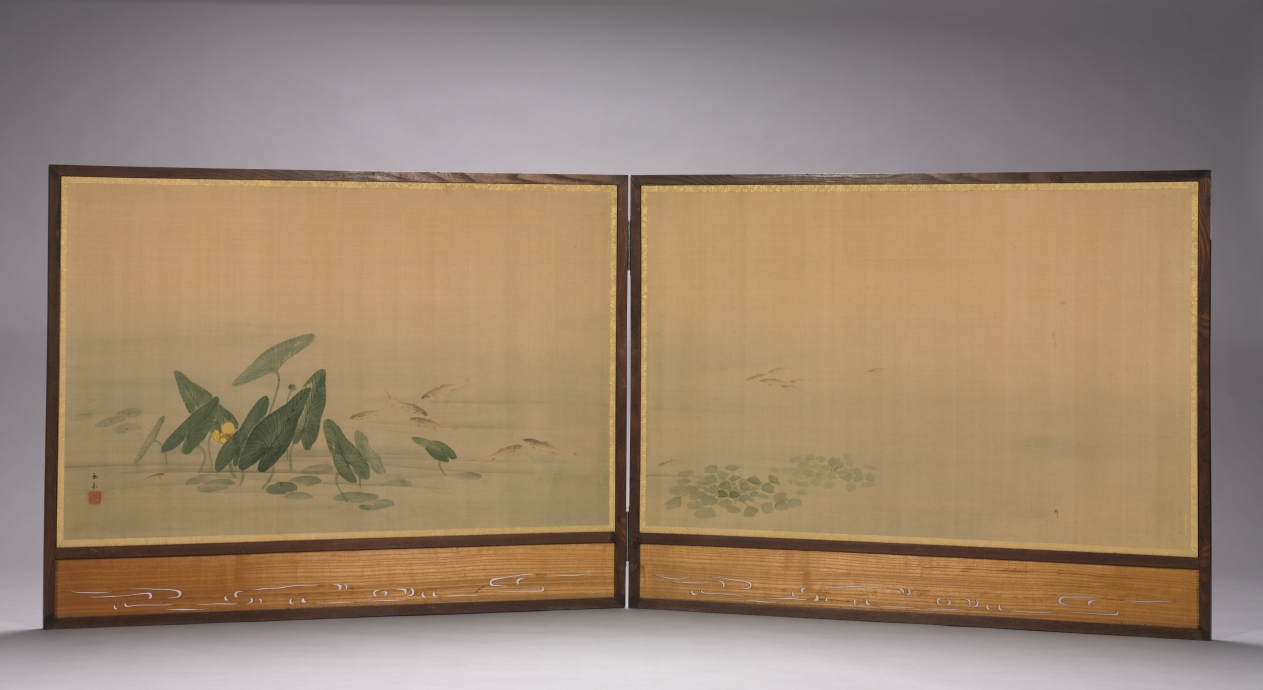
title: Fish in a Lotus Pond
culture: Japan, Edo period (1615–1868)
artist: Ōhara Donshū (Japanese, d. 1857)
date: 1800s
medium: two-fold screen; ink and color on silk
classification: Painting